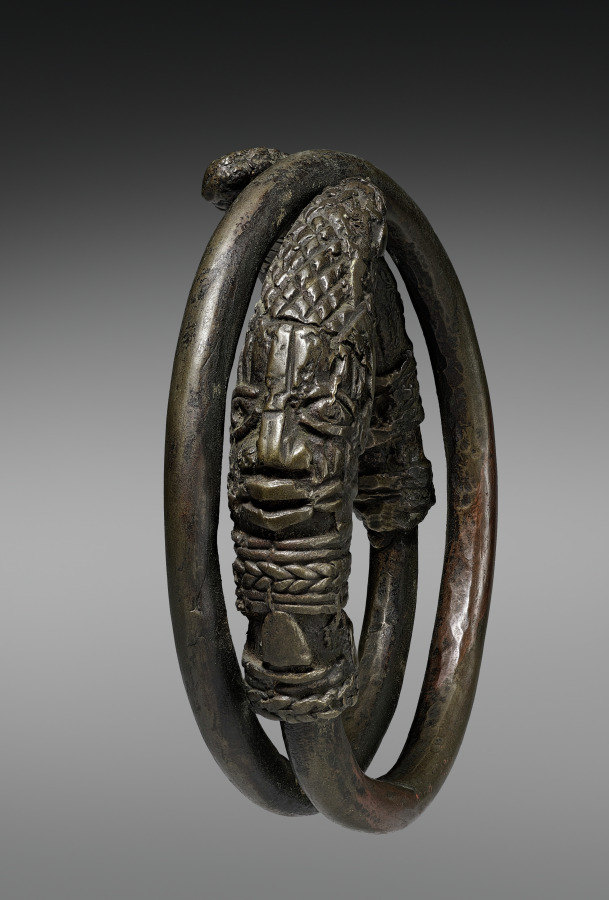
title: Hand Coil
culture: Nigeria, Benin Kingdom, Ẹdo peoples, members of the Igun Eronmwon (royal brasscasters) guild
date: 1800s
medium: Copper alloy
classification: Implements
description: While this looks like a bracelet, it wasn’t worn around a wrist. A chief or titleholder grasped this “hand coil” vertically during the annual Iguẹ festival, during which such men reaffirm their relationship to the Ọba, whose mystical powers are strengthened. An image of a man’s head caps each end of the thick, twisted metal. Repeated human touch rubbed the undecorated lengths bright and shiny. Though small, the coil’s detail is enormous: to capture it, the artist incised the designs in wax during the casting process. They show these men are elites, with necklaces, caps, and whisker-like facial markings.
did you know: This is a unique object; it was made using the lost-wax casting technique, which destroys the wax mold in the creation process.